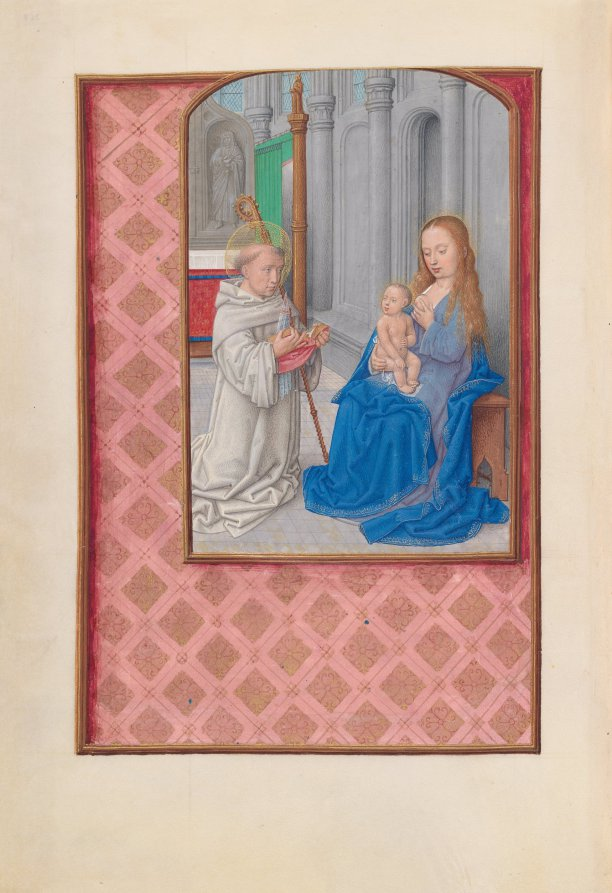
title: Hours of Queen Isabella the Catholic, Queen of Spain: Fol. 267v, Vision of St. Bernard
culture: Flanders, Ghent and Bruges, late 15th century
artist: Master of the First Prayerbook of Maximillian (Flemish, c. 1444–1519)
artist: and Associates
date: c. 1500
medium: ink, tempera, and gold on vellum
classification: Bound Volume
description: This manuscript was illuminated by a circle of at least five highly organized manuscript painters active in the Flemish cities of Ghent and Bruges. The principal illuminator was Alexander Bening, who painted the majority of the book's miniatures. Manuscripts produced by this circle of artists are renowned for the decoration of their borders, which typically feature a rich variety of realistically-painted flowers, birds, and butterflies. This prayer book, called a book of hours, was intended not for a cleric, but for the private devotions of a lay person-in this case, Isabella the Catholic, Queen of Spain (1451-1504). Isabella's coat of arms embellishes the book's frontispiece. It is unlikely that the book was commissioned by the Queen herself; rather, she probably received it as a diplomatic gift from someone courting her patronage, perhaps Cardinal Francisco Jimenez de Cisneros. A Franciscan friar, Jimenez was dependent upon Isabella for his advancement, first to the post of Queen's confessor in 1492, and then to Archbishop of Toledo in 1495.